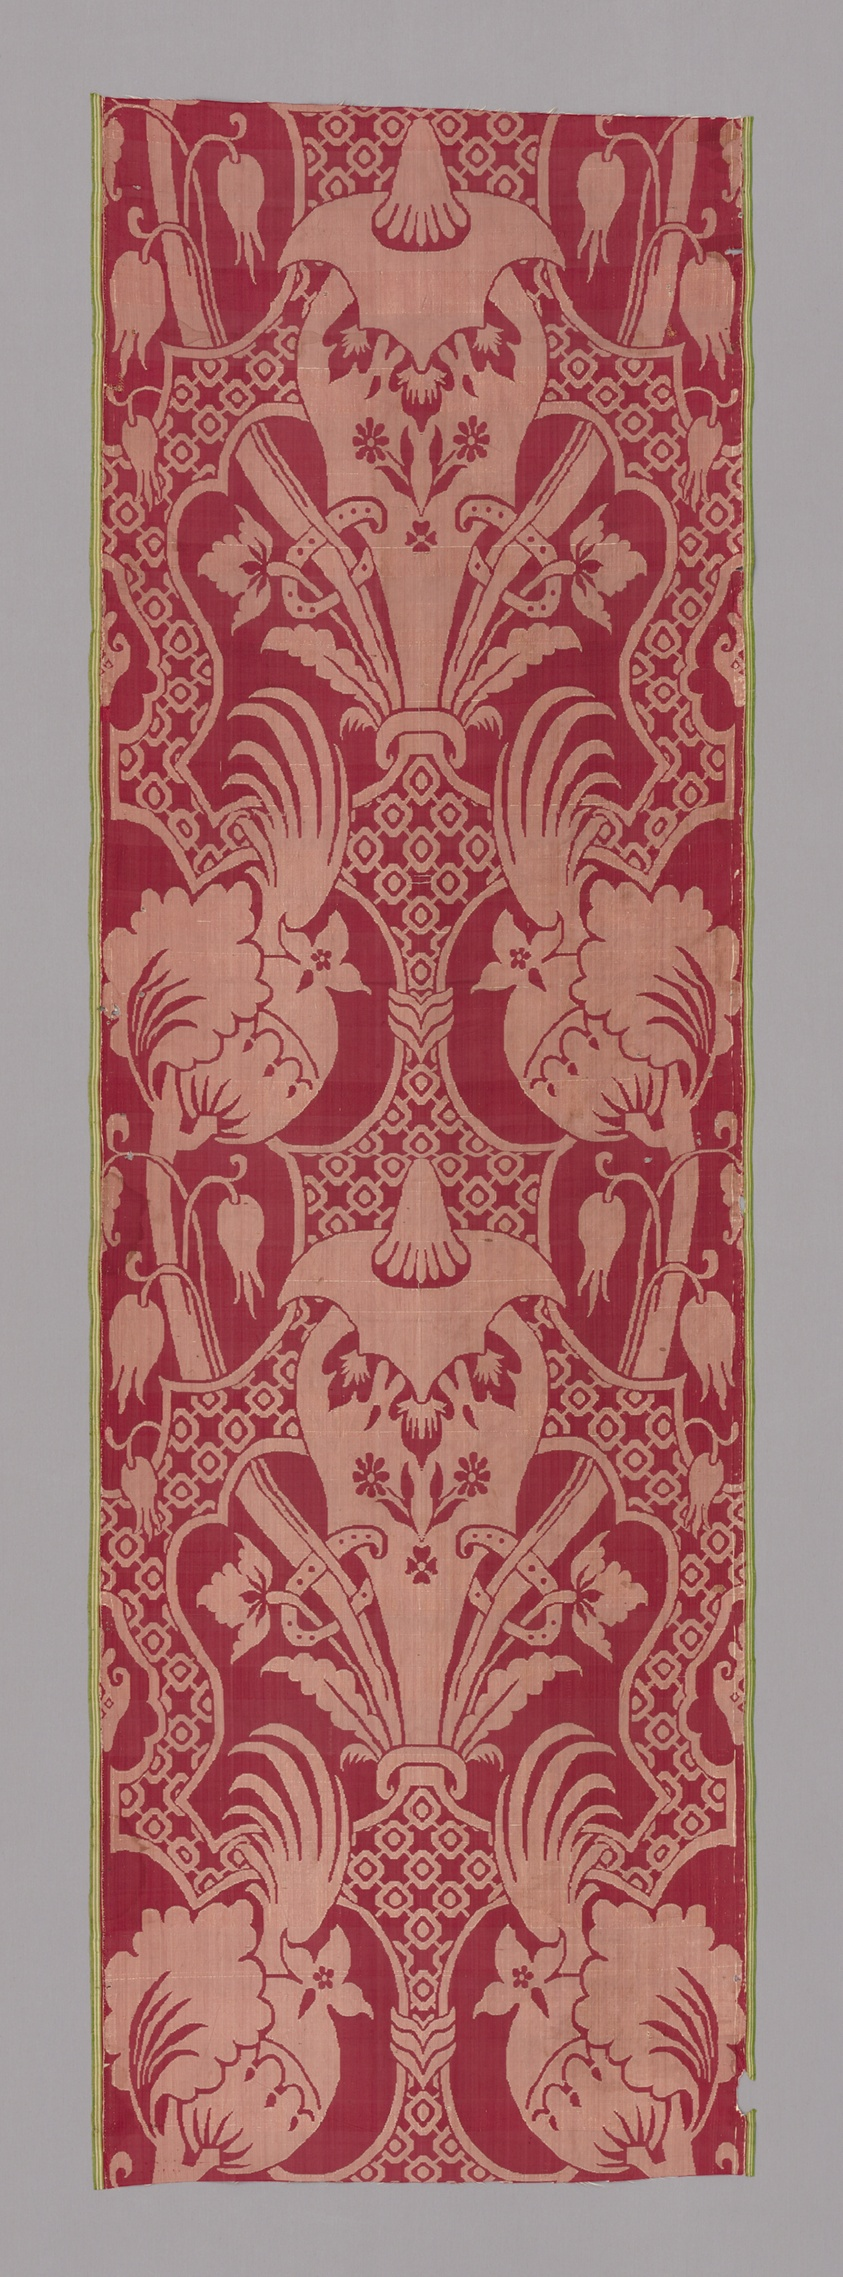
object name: Textile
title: Panel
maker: Italy, probably Piemonte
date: 1700/10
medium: Silk, 4:1 satin damask weave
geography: Italy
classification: textile; weaving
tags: fruit